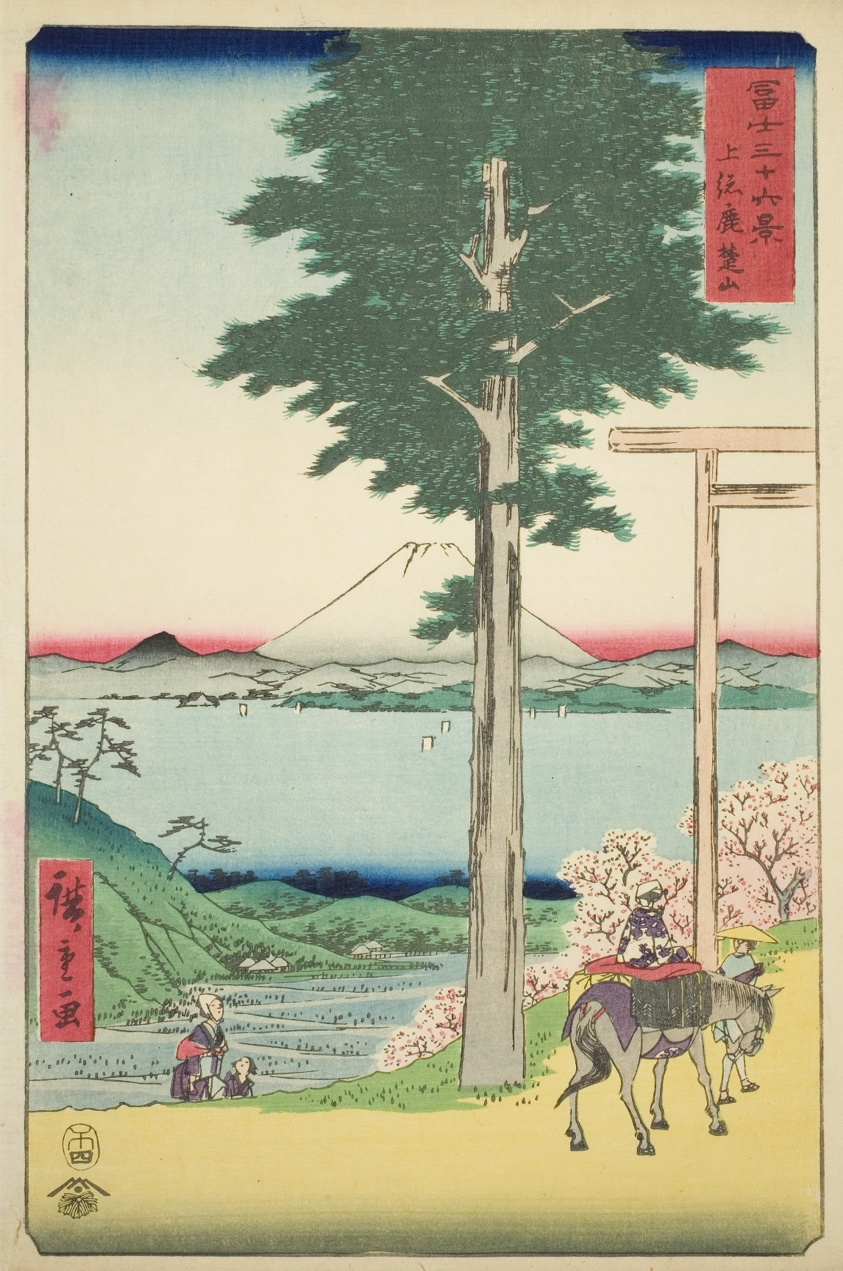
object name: Print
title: Mount Kano in Kazusa Province (Kazusa Rokusozan), from the series "Thirty-six Views of Mount Fuji (Fuji sanjurokkei)"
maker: Utagawa Hiroshige 歌川 広重; Japanese, 1797-1858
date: 1858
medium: Color woodblock print; oban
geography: Japan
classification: print; asian art